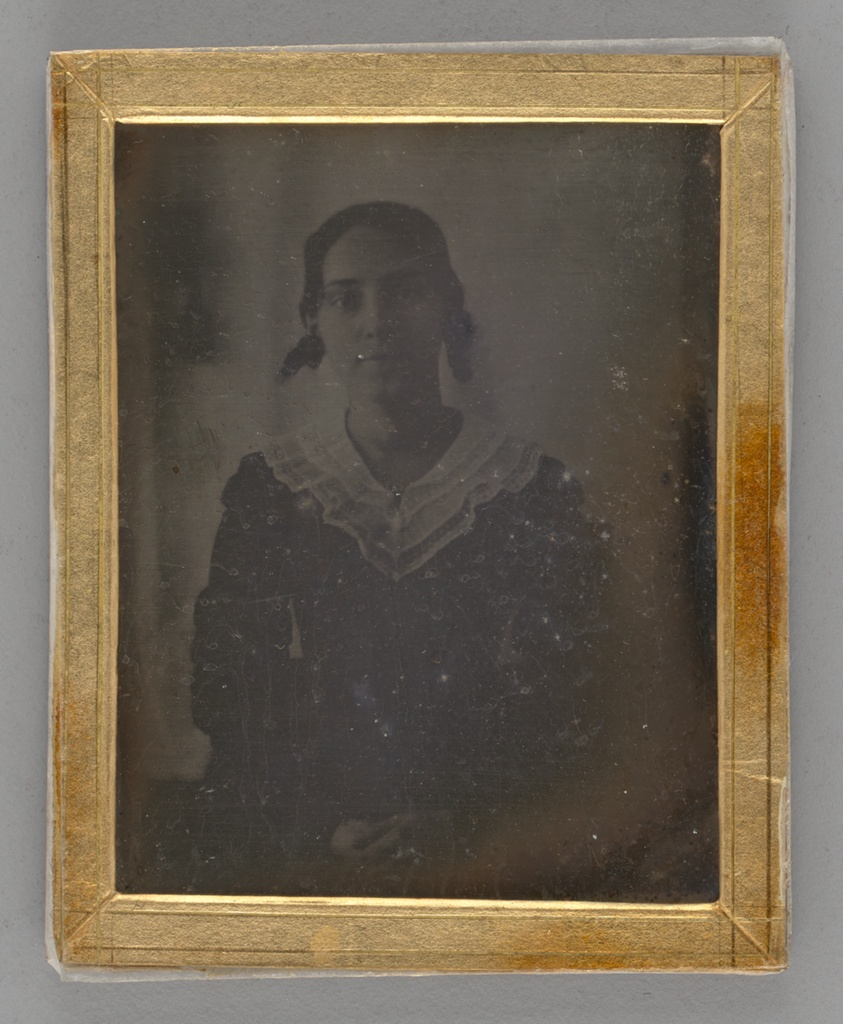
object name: Photograph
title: Untitled (Portrait of a Woman)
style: 19th century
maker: E. and Wm. Sage (American, 19th century)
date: 1842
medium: Daguerreotype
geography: United States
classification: portrait; photograph; photographic process; photography; portrait; daguerreotype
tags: lundberg collection, portraits, portraits: female subject, photography, woman, female, portrait